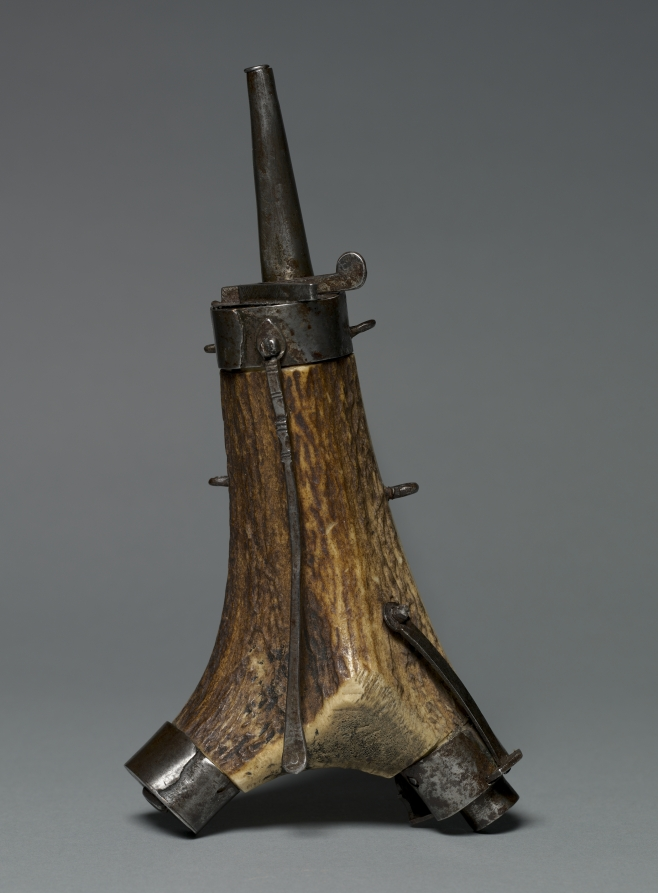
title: Powder Flask with Standing figures of a Man and Woman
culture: Germany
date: 1570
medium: elk horn, steel mounts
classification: Arms and Armor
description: Powder flasks are small, portable containers designed to hold gunpowder. From the 1400s to the 1800s, powder flasks were indispensable for charging and priming firearms of all types. Without powder flasks firearms were of little use to their owners. Many highly decorated flasks rank as works of art. During the 1500s, they were frequently decorated with images of famous historical figures.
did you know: The year 1570 can be seen below the standing male and female who may represent the original owners.